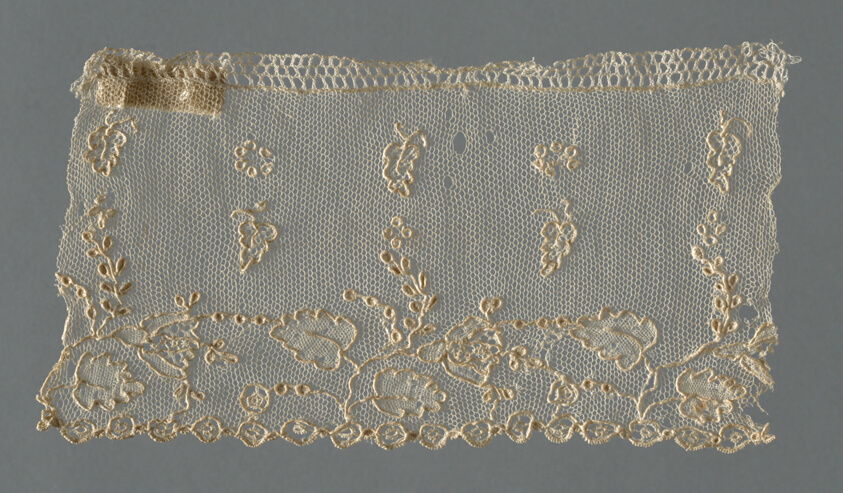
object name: Textile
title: Fragment (Border)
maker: France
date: 1850/1900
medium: Linen, needle lace of a type known as "Point D'Alencon"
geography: France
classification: textile; lace - needle